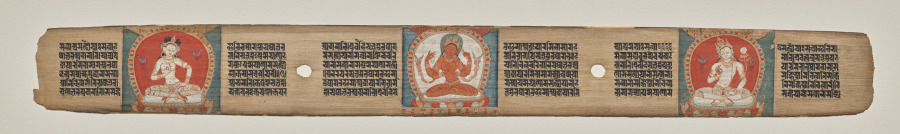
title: Prajnaparamita flanked by a white female figure and a white bodhisattva, folio 90 (recto), from a Manuscript of the Perfection of Wisdom in Eight Thousand Lines (Ashtasahasrika Prajnaparamita-sutra)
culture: Eastern India, Bihar, Vikramashila Monastery. Painting: Nepal, Kathmandu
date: Sunday, September 14, 1119 (year 239 of the Newar Samvat in the month of Ashvina)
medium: gum tempera and ink on palm leaf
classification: Painting